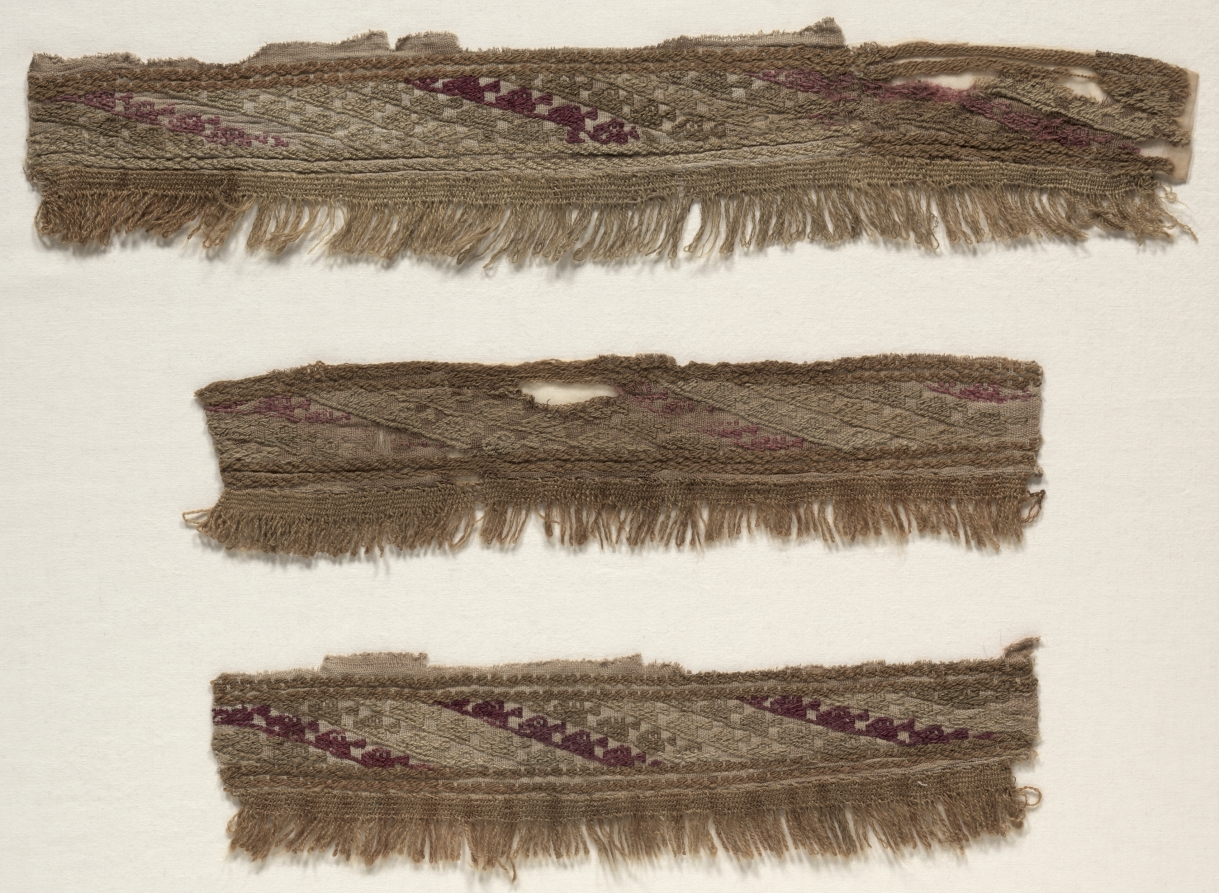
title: Three Border Fragments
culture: Peru, Central Coast, Chancay, 12th-15th century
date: c. 1100–1400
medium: tabby, brocaded; cotton and wool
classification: Textile